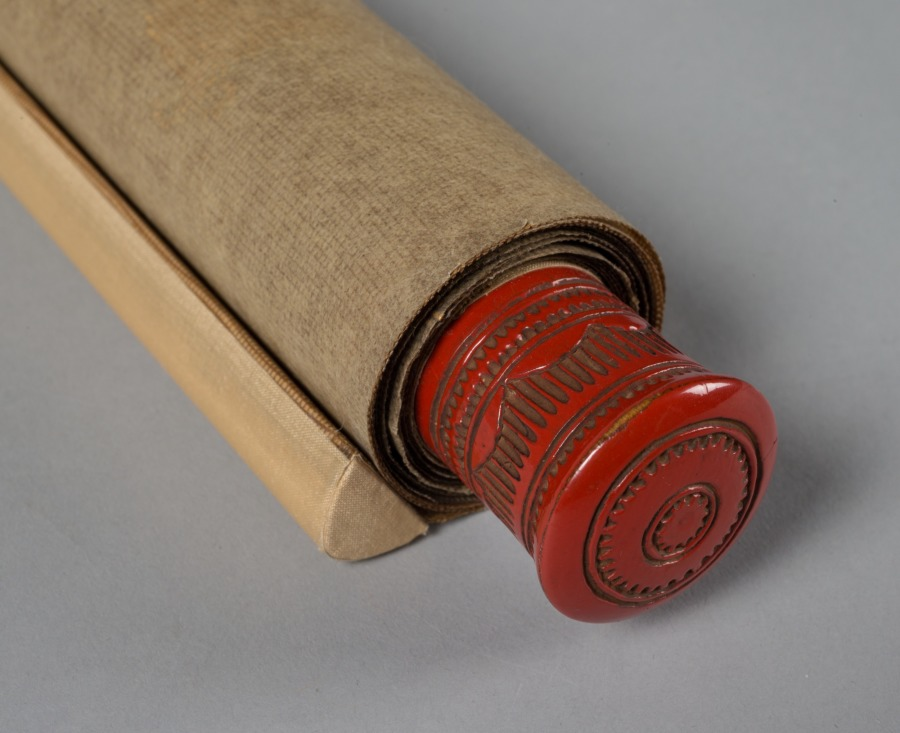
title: Birds in a Tree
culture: Japan, Edo period (1615–1868)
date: c. 1700–1868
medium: hanging scroll; silk gauze brocaded with gold and silk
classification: Textile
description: This scene of two Chinese pheasants with a flowering plum tree (a sign of the arrival of spring in Japan) is not painted. All the lines and surfaces are created by colored threads carefully stitched together into the silk. Consequently, the surface appears quite different from paintings on paper.